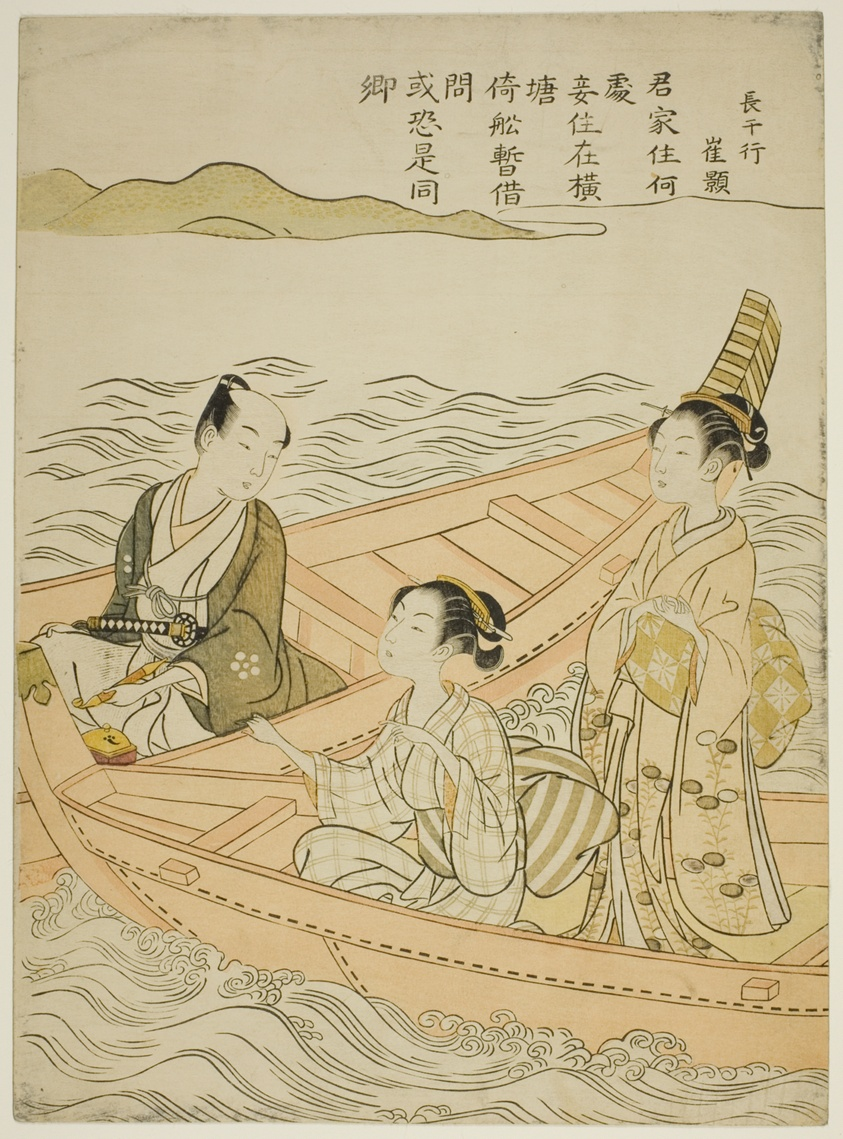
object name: Print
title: Meeting on the River (parody of Hakurakuten)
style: Japanese (culture or style)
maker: Suzuki Harunobu 鈴木 春信; Japanese, 1725 (?)-1770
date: c. 1767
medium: Color woodblock print; chuban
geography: Japan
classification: woodblock print; print; asian art